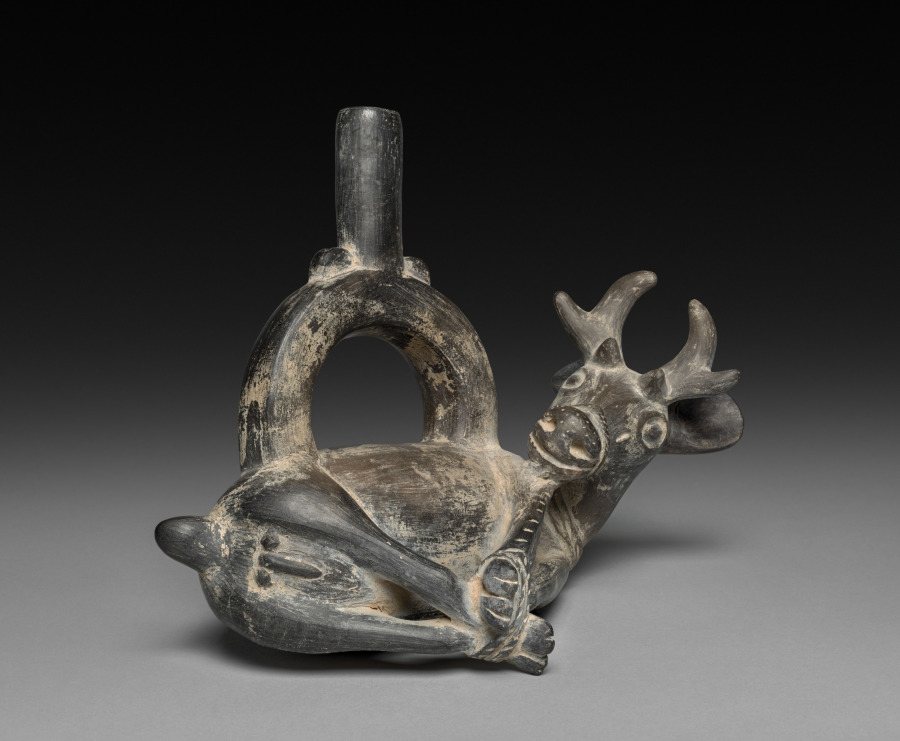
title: Bound Deer Effigy Vessel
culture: Andes, North Coast, Chimú people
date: 1000–1460s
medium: Ceramic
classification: Ceramic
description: This vessel was made by an artist of the Chimú Empire of Peru’s north coast. In the art of the Moche, an earlier culture in the region, the deer had complex symbolism related to ritual combat and the capture of prisoners. A memory of that symbolism may survive here in the binding of the deer’s feet.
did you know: Chimú potters fired their vessels in an atmosphere of reduced oxygen to achieve a uniform black surface.